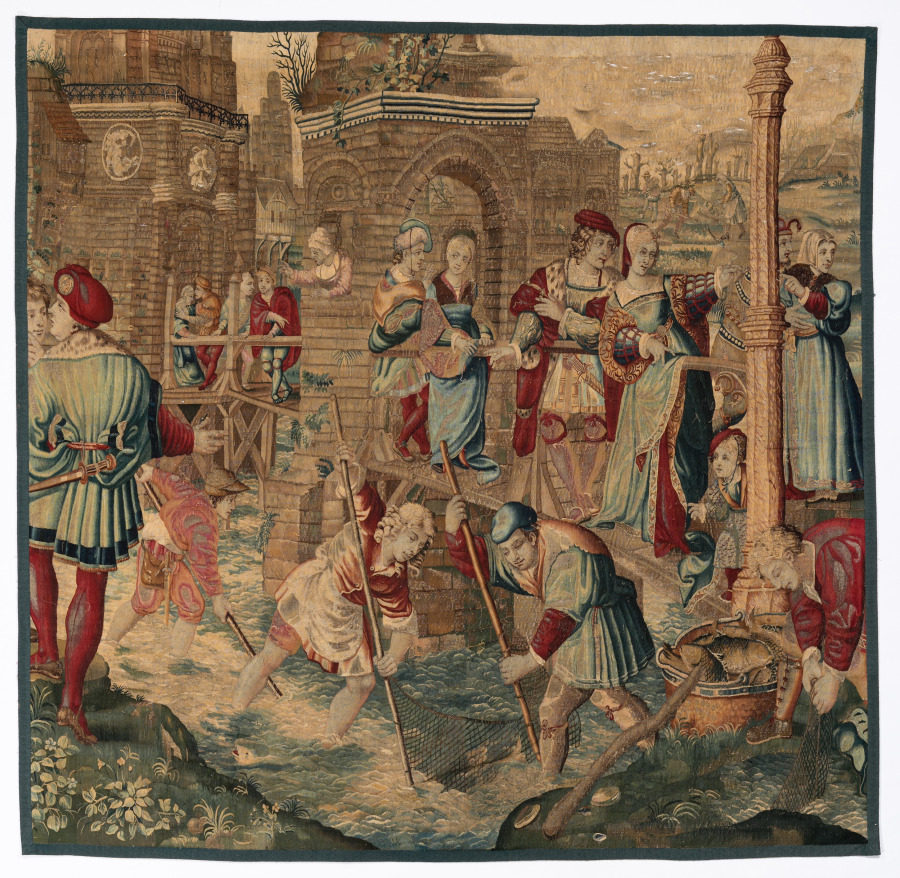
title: Spring: Fishing Scene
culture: France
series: Four Seasons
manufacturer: possibly by Gobelins Manufactory (France, Paris, est. 1662)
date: designed c. 1535, woven mid- to late 1600s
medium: Wool, silk, and gold filé: tapestry weave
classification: Tapestry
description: In this springtime scene, two fishermen wade in a river, dragging a net suspended between two poles. A noble couple on a bridge gestures toward other fishermen, who occupy the other side of this scene in other extant examples of this tapestry with a larger picture plane. In the background, townspeople walk on bridges that lead to the gateway of a town with brick walls and portals. In the far distance, farmers till the soil to sow new seeds, another typical activity associated with spring. The trees on the hills are just beginning to sprout new buds.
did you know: Spring was considered to be a season of courtship and romance; perhaps the gentleman on the bridge in the red cap is trying to catch the attention of the lady next to him.